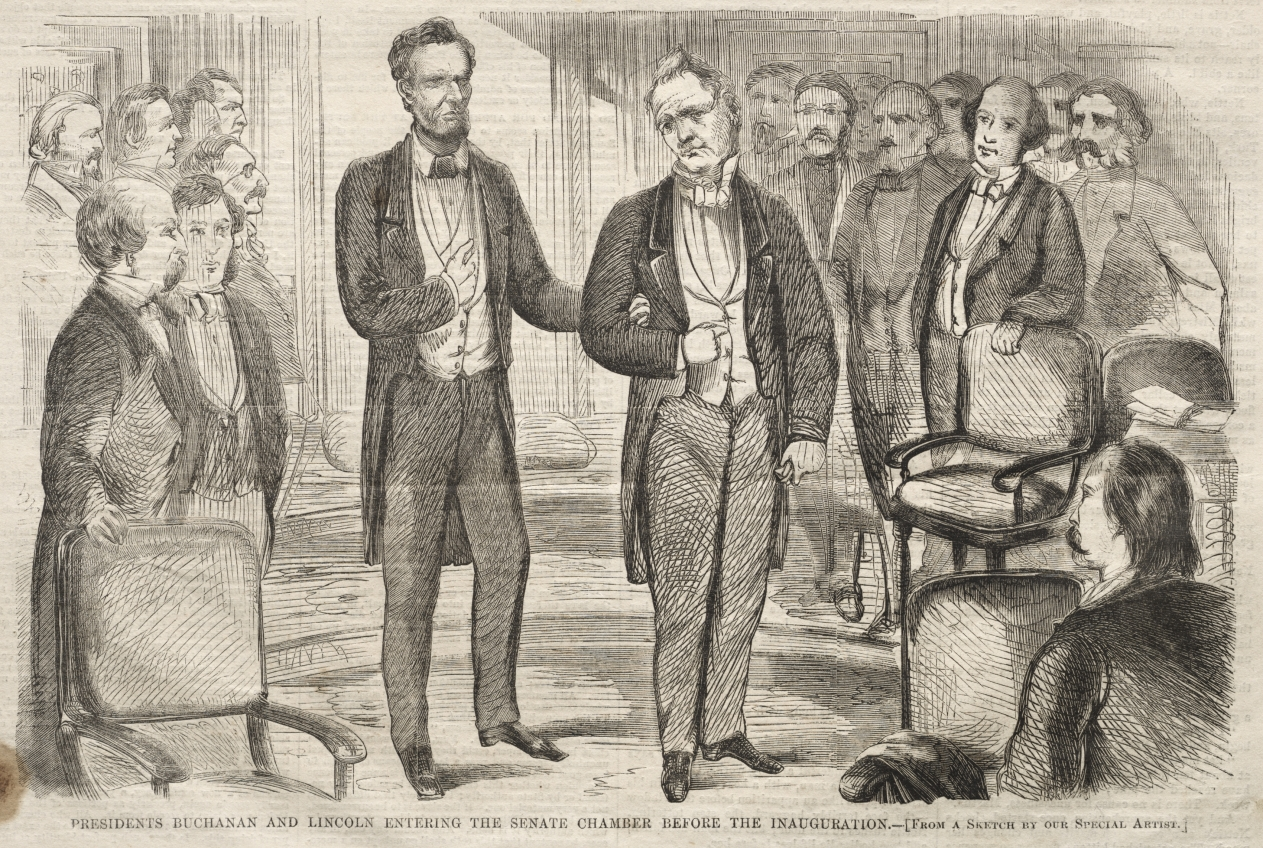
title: Presidents Buchanan and Lincoln Entering the Senate Chamber before the Inauguration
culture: America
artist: Winslow Homer (American, 1836–1910)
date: 1861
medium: wood engraving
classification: Print